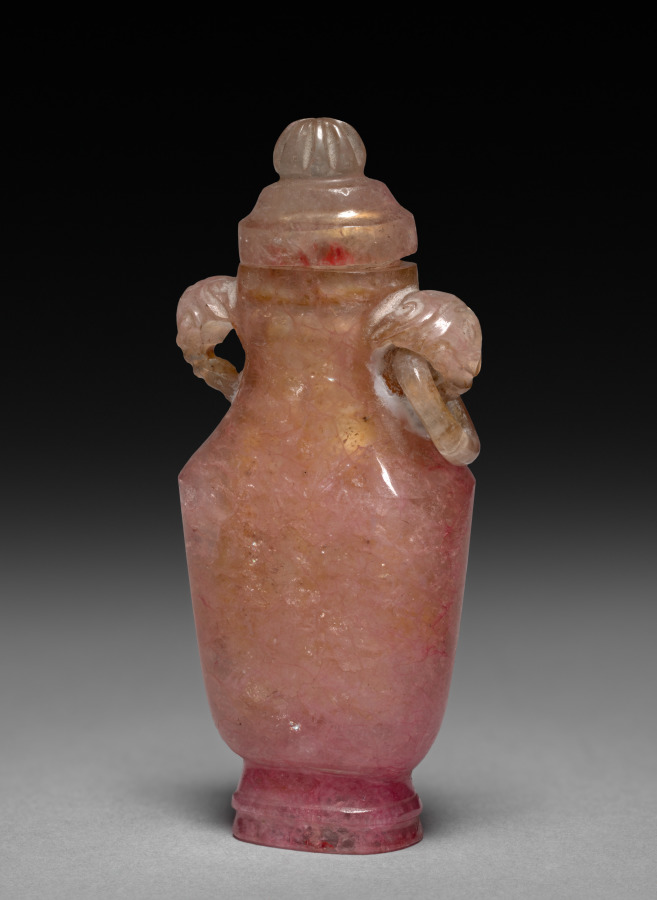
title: Miniature Jar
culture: China, Qing dynasty (1644-1911)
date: 19th-early 20th century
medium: jade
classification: Jade